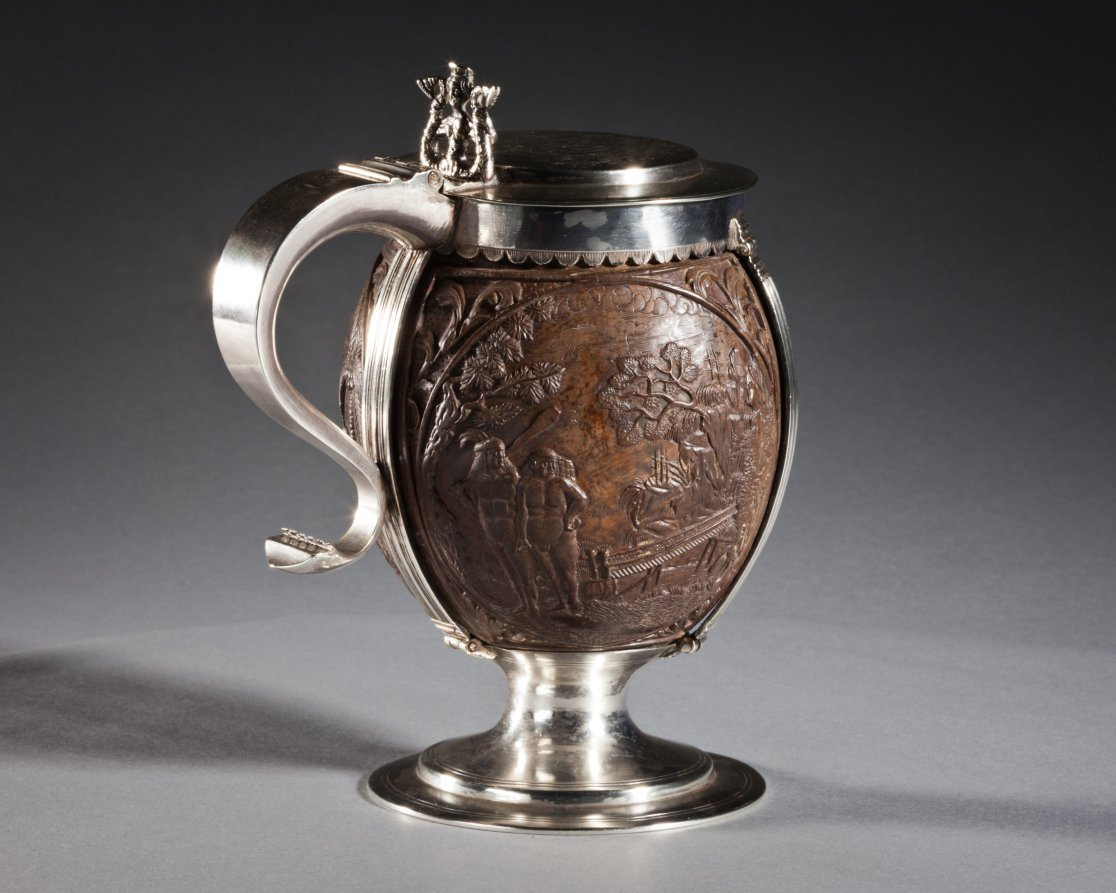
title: Coconut Cup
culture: carved coconut, probably The Netherlands; silver mount, probably England, 17th century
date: c. 1630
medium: carved coconut in silver mount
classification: Metalwork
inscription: top lid has engraved coat-of-arms, underside of lid has inscription: George Lewis TIVERTON Feby, 1st 1760.